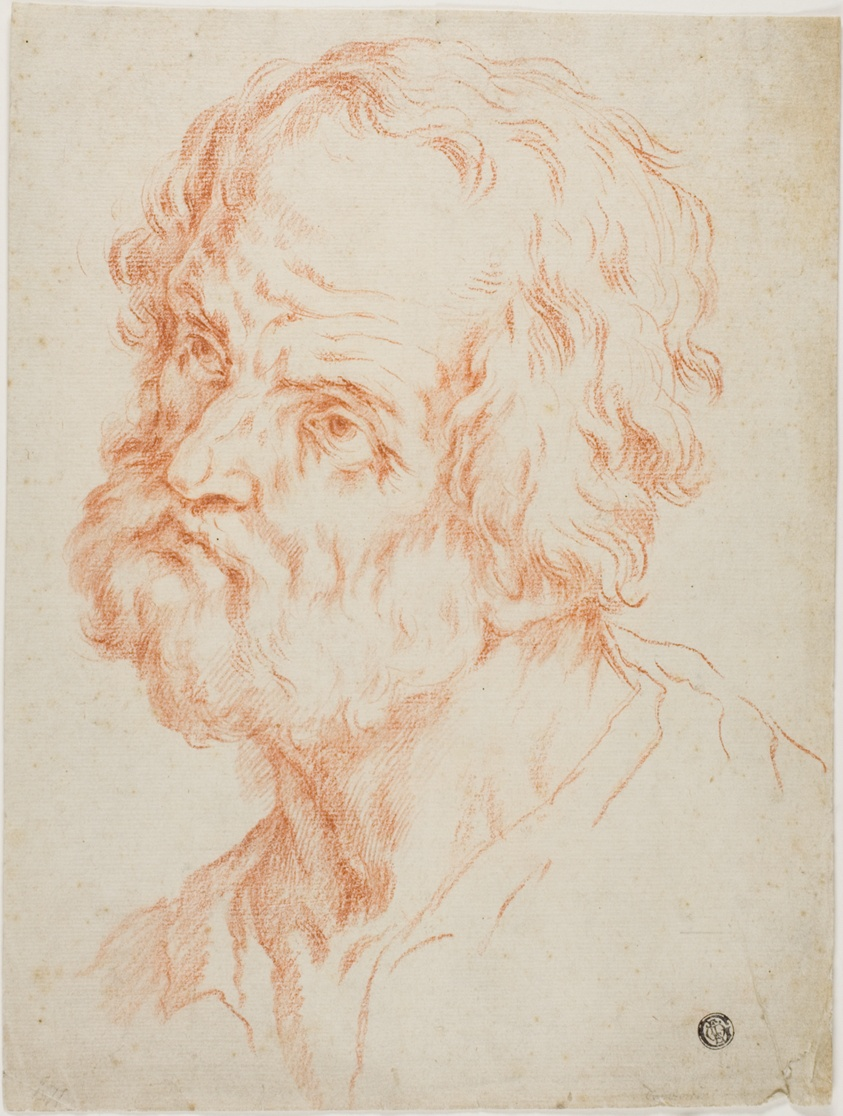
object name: Drawing and Watercolor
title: Male Head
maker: After Simone Cantarini; Italian, 1612-1648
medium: Red chalk on ivory laid paper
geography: Italy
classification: chalk; drawings (visual works); prints and drawing